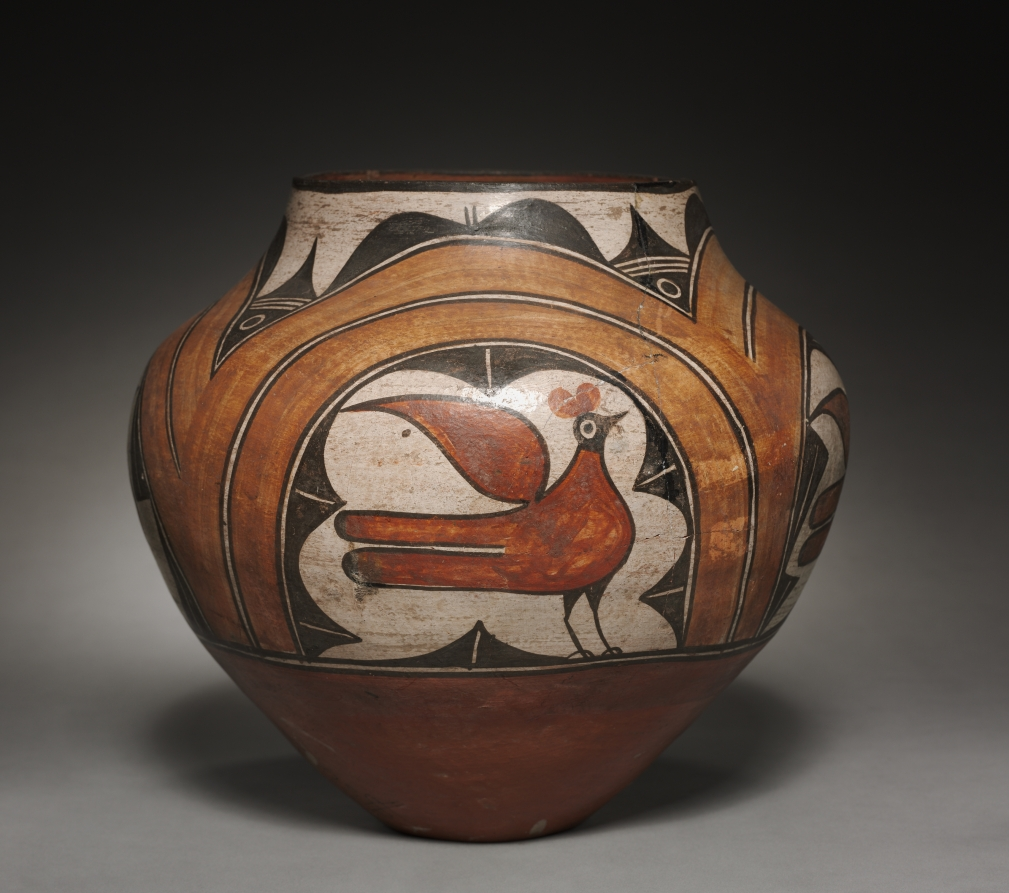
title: Water Jar/ Olla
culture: Southwest, Pueblo, Zia, Post- Contact Period, 20th century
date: 1900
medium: ceramic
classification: Ceramic